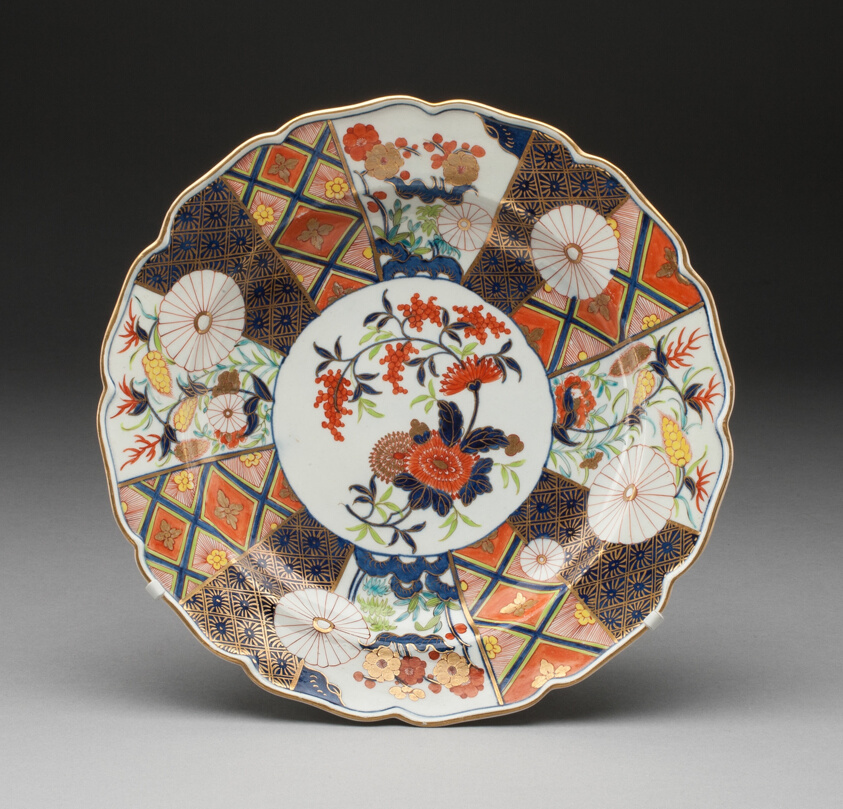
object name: Ceramics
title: Plate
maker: Worcester Porcelain Factory (Warmstry House Period, 1751–1783); Worcester, England, founded 1751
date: c. 1770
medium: Soft-paste porcelain, polychrome enamels and gilding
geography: Worcester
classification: plate (general, dish); dish (vessel); porcelain; european decorative arts; ceramics